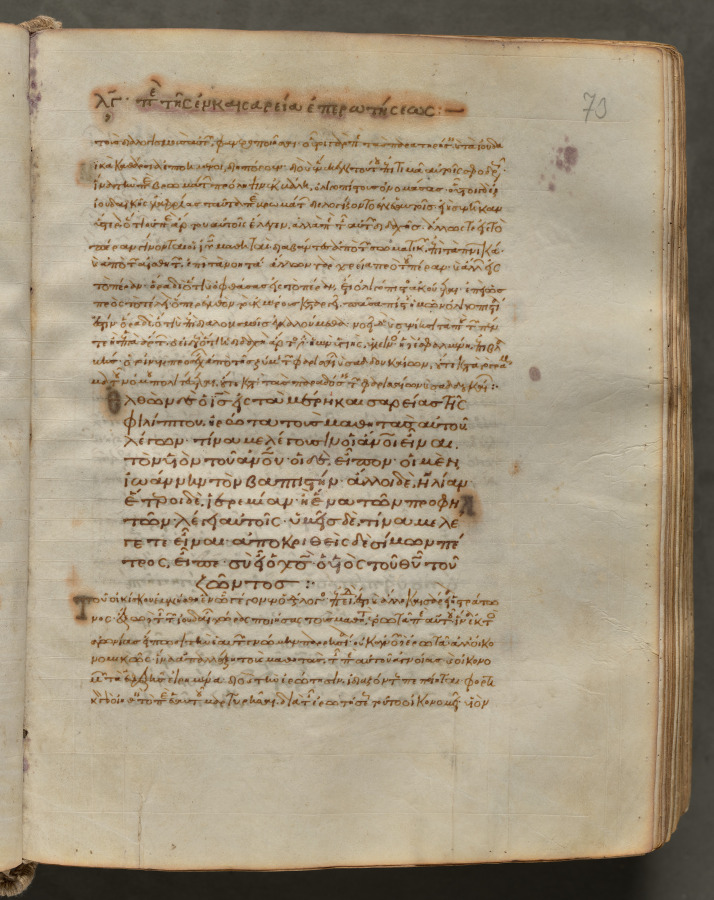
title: Text, folio 73 (recto), from a Gospel Book with Commentaries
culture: Byzantium, Constantinople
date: c. 1000–1100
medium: ink, tempera, and gold on vellum; leather binding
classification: Bound Volume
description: Each of the four gospels in this book opens on a page with brilliantly illuminated borders depicting the author of the text as well as birds-principally peacocks, symbols of the immortality of the soul-and fountains, representing the fountain of life and the salvation of the soul. This volume consists of 428 leaves with texts in Greek. Its level of sophistication suggests that it was probably written and decorated in a monastery in Constantinople.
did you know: Gospel Books were carried in procession through Byzantine churches.